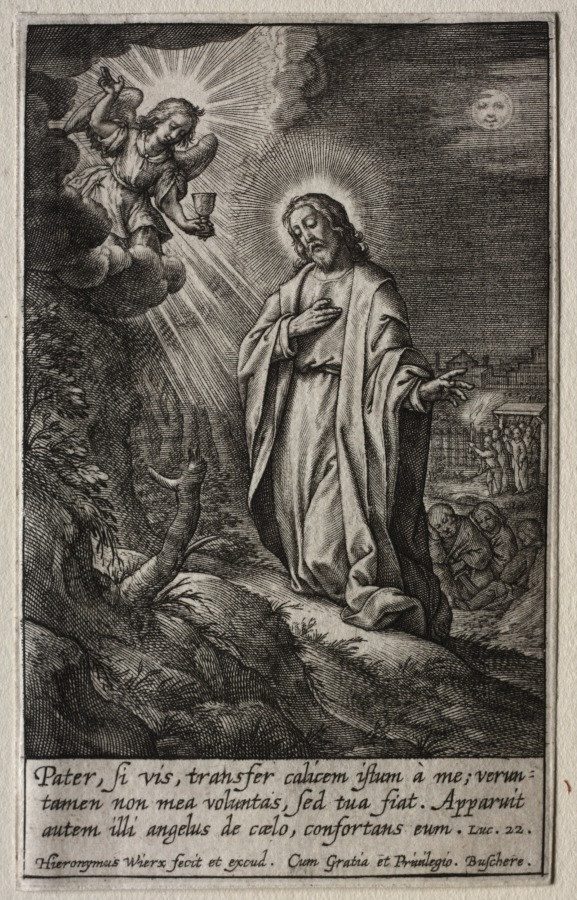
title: The Passion of Christ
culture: Flanders, late 16th-early 17th century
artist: Hieronymus Wierix (Flemish, 1553–1619)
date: before 1619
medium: engraving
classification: Print